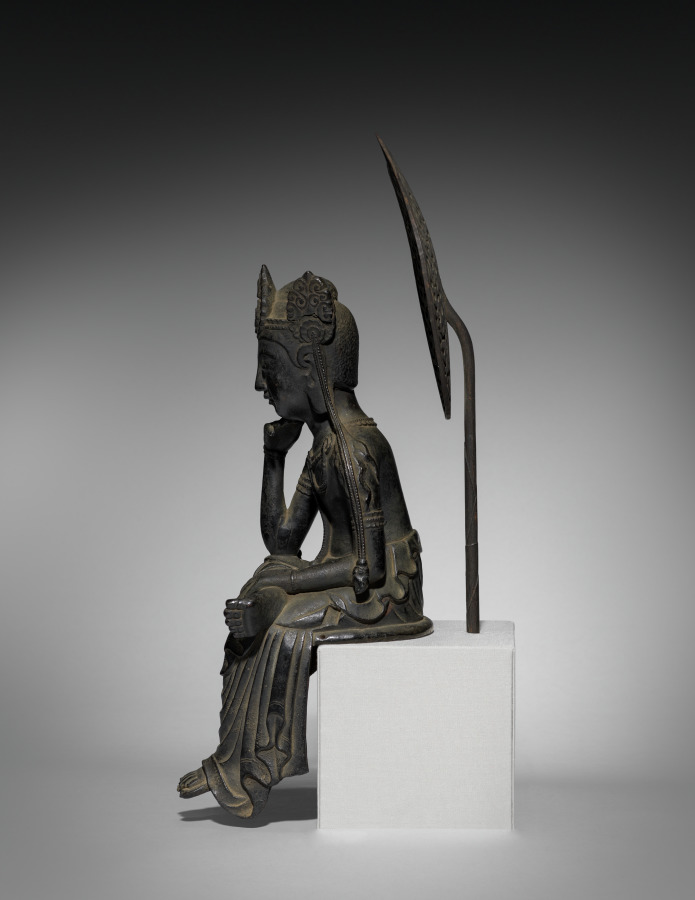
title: Buddha of the Future (Miroku Bosatsu)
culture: Japan, Asuka period (538–710)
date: late 600s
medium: cast bronze, incised, with traces of gilding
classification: Sculpture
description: Buddhism was introduced to Japan in the sixth century. For early Japanese devotees, Buddhism offered the promise of salvation through faith in the Buddha of the Future, who would appear at the end of the world. The concept of eternal salvation held particular resonance with the Japanese aristocracy, who became the staunchest supporters of this new faith. Small sculptures like this one, with its gentle grace and powerful presence, were popular devotional objects.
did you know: The Sanskrit name of this being, Maitreya, derives from the Sanskrit word for friend, mita.